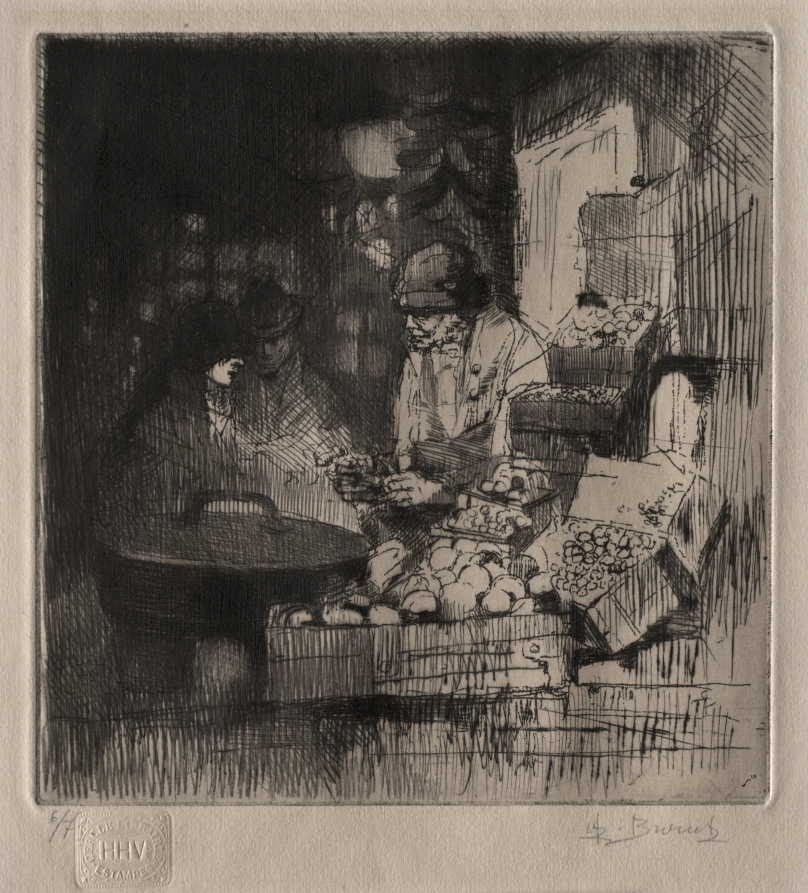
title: The Chestnut Seller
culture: France, 20th century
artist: Auguste Brouet (French, 1872–1941)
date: c. 1902–41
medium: etching, drypoint and roulette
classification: Print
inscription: in graphite, lower left: 6/75; lower right: A. Brouet